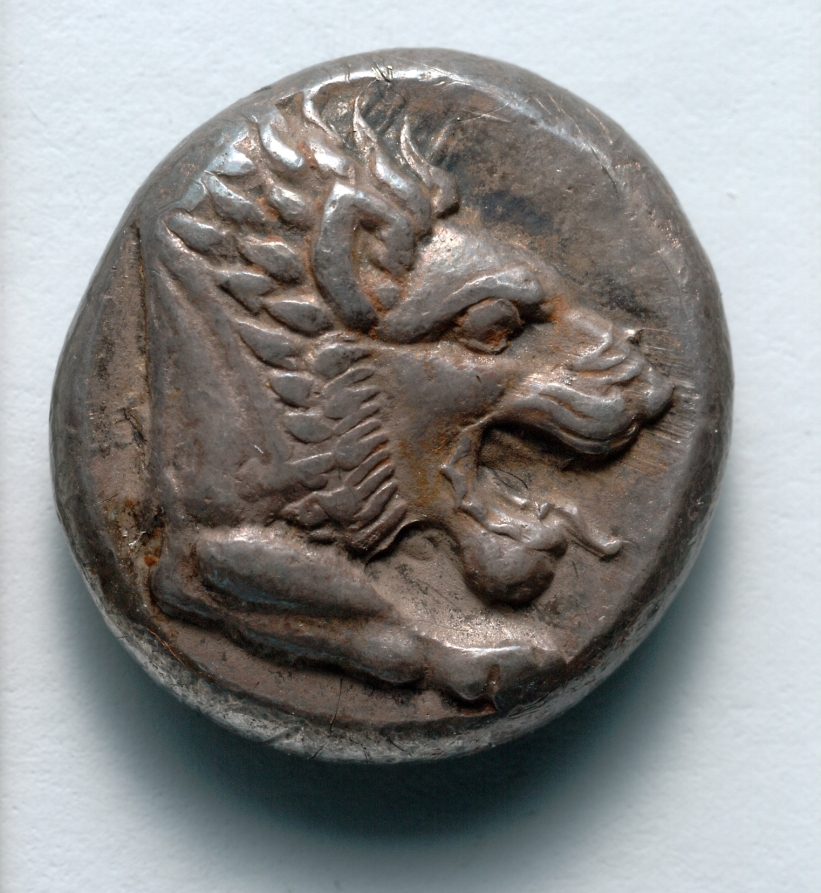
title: Drachm: Forepart of Lion (obverse)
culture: Greek, minted at Knidos (Karia)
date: 465–449 BCE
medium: silver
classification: Coins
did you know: The forepart of a lion on Knidian coins is thought to represent Apollo.